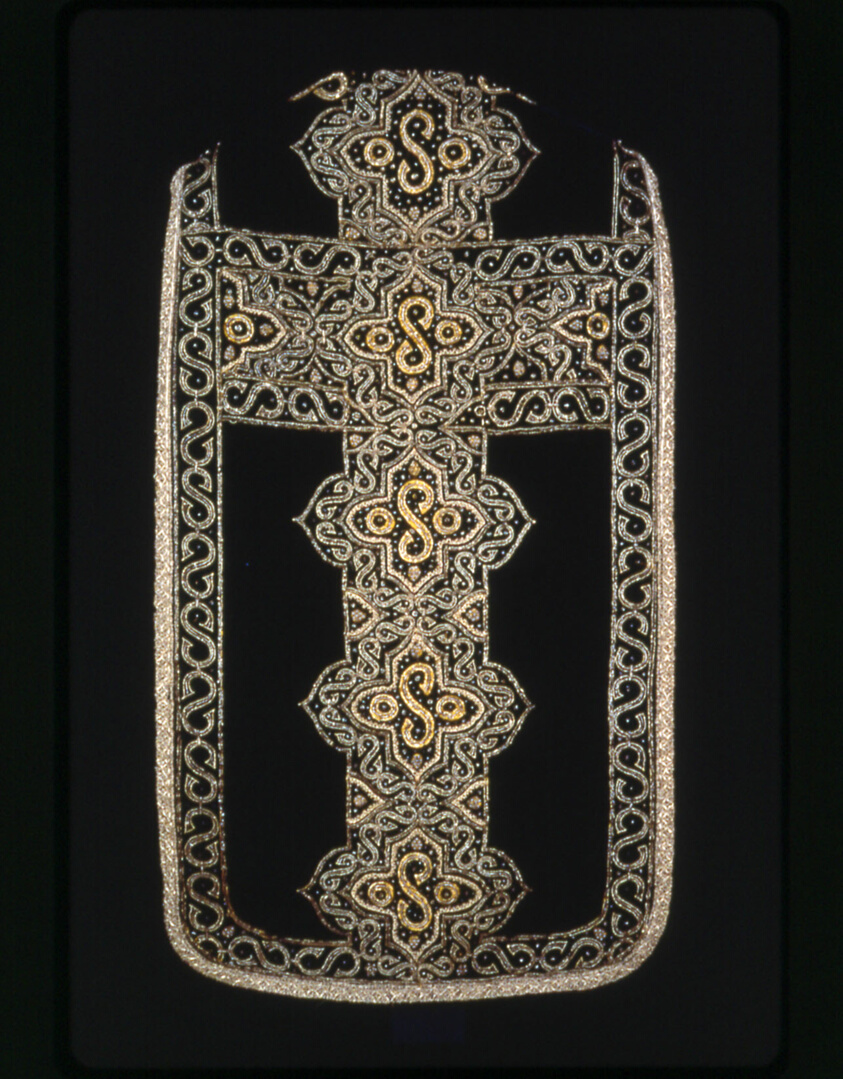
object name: Textile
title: The Stafford Chasuble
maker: England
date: 1620/40 (appliquéd late 17th century)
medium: Silk, broken warp chevron twill weave, cut solid velvet; appliquéd with silk, satin weave; embroidered with gilt-metal strips and purl, gilt-metal-wire-wrapped linen, and gilt-metal-strip-wrapped silk in laid work and couching; edged with gilt-metal-strip-wrapped silk, bobbin straight lace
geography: England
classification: textile; needlework (visual works); lace - bobbin; weaving - velvet; liturgical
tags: coat of arms, royalty